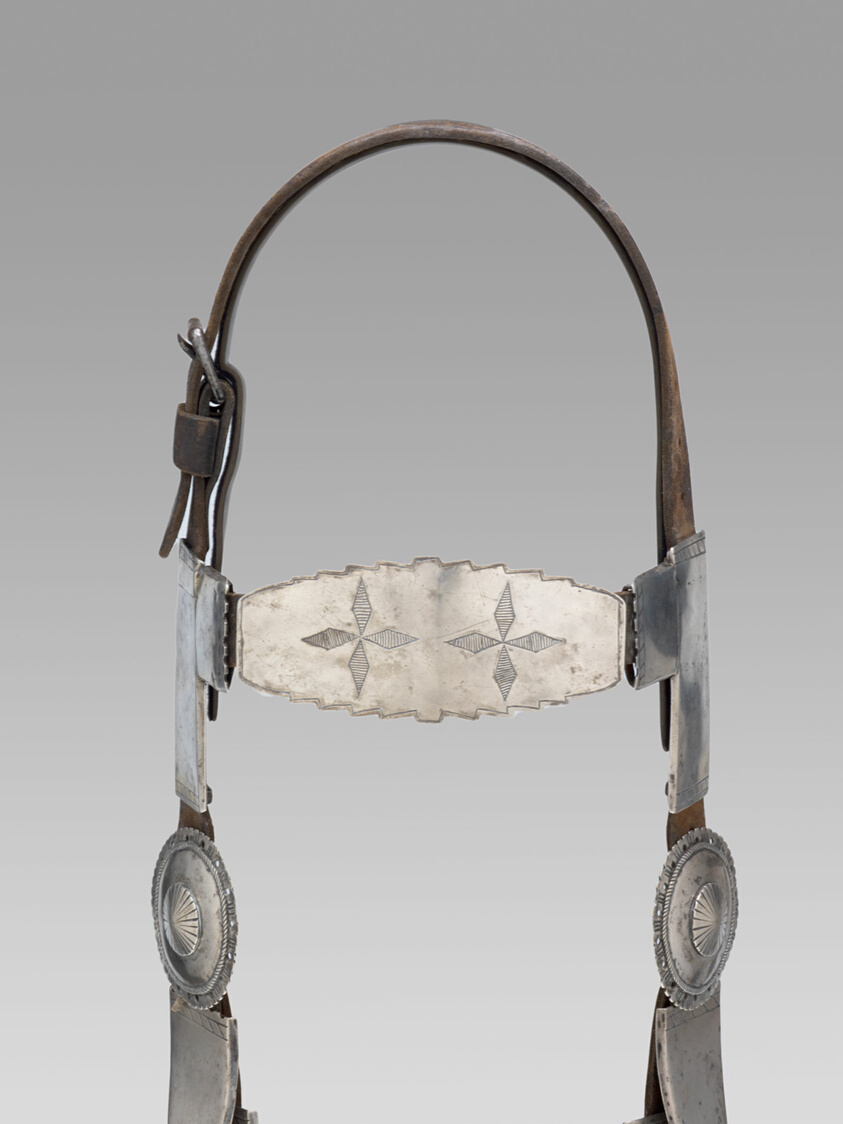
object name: Costume and Accessories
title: Horse Headstall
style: navajo, dine, americas, native american, native north american, Arts of the Americas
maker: Navajo (Diné) (Northern New Mexico or Arizona, United States)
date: 1870s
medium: Silver and leather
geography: New Mexico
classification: headpiece (animal equipment); american decorative arts; art of the americas; silver; decorative arts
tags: horse, ornaments, silver (color)